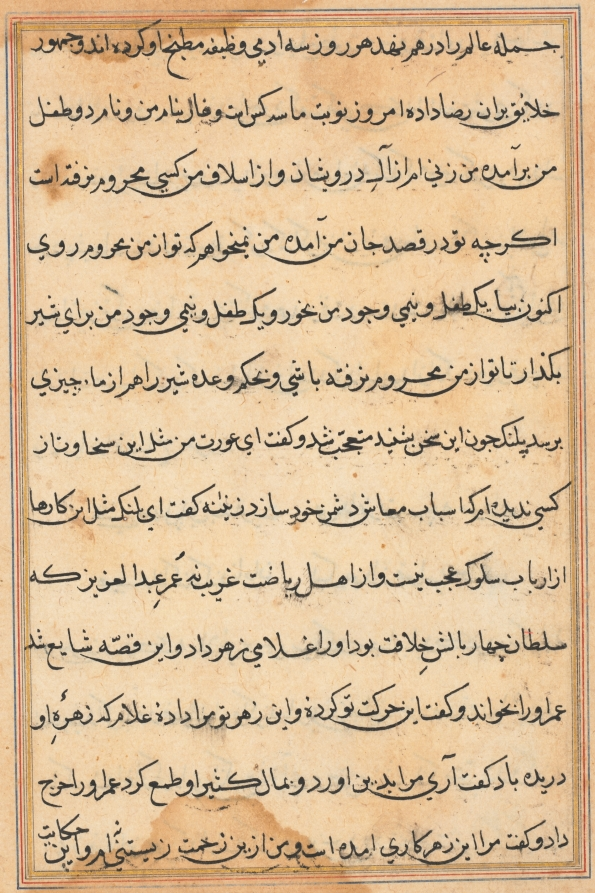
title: Page from Tales of a Parrot (Tuti-nama): text page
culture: Mughal India, court of Akbar (reigned 1556–1605)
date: c. 1560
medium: gum tempera, ink, and gold on paper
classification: Painting